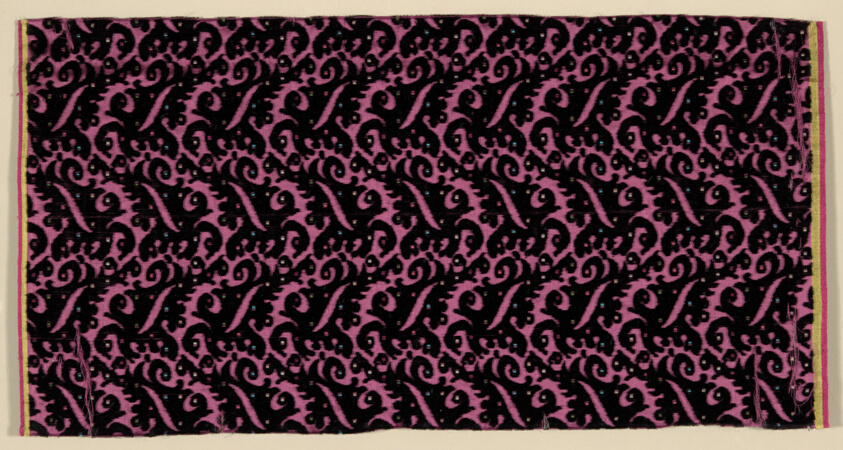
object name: Textile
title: Fragment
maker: Designed by Gertrude Rapp (American, 1808–1889); Woven by the Harmony Society (American, founded in Germany, 1785-1916)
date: 1838/1855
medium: Silk, satin weave with supplementary patterning warps and pile warps forming cut voided velvet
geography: United States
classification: textile; weaving - velvet; weaving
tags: fashion